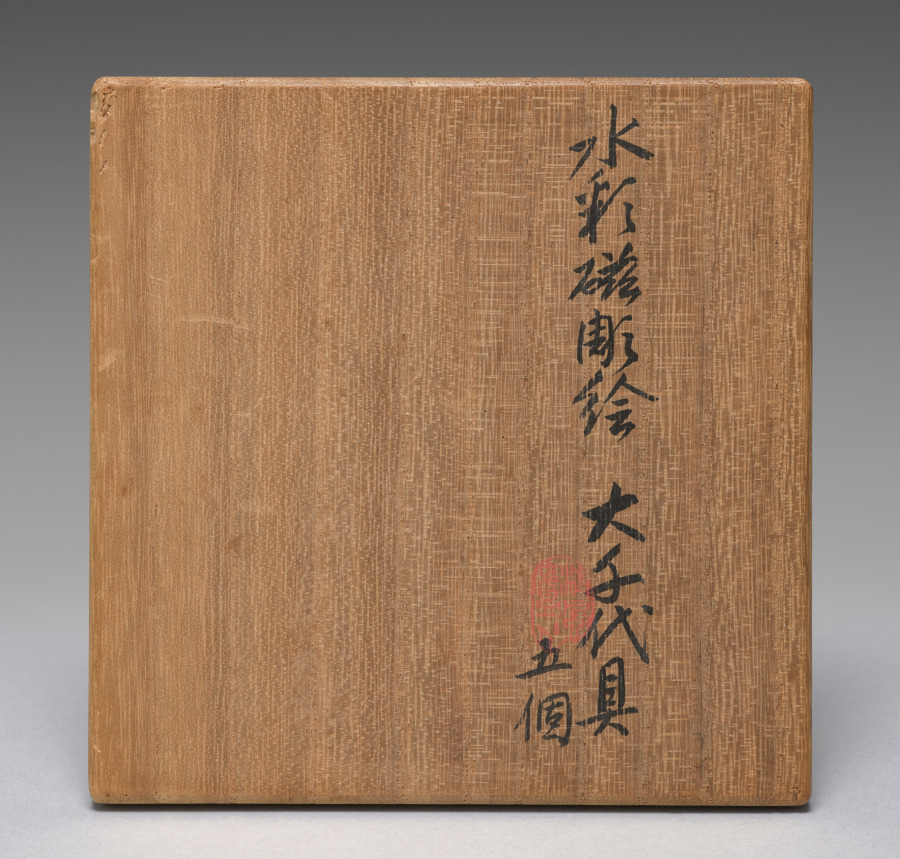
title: Dishes with Flowers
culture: Japan, Taishō period (1912–26) or Shōwa period (1926–89)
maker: Seifū Yohei IV (Japanese, 1872–1951)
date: 1914–46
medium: Set of five dishes; porcelain with underglaze yellow and blue glaze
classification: Ceramic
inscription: 清風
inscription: 清風造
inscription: 成山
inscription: 清風盧人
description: One can imagine a cool summer breeze when looking at this set of dishes, each shaped with a crenulated mouth and glazed with blue. Around the rim and into the basin, the bowls have low-relief designs of flowers with underglaze yellow petals; their leaves and stems show white through the glaze. On each dish, the design continues over the rim onto one side.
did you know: Seifū Yohei IV’s dishes with flowers feature underglaze yellow.